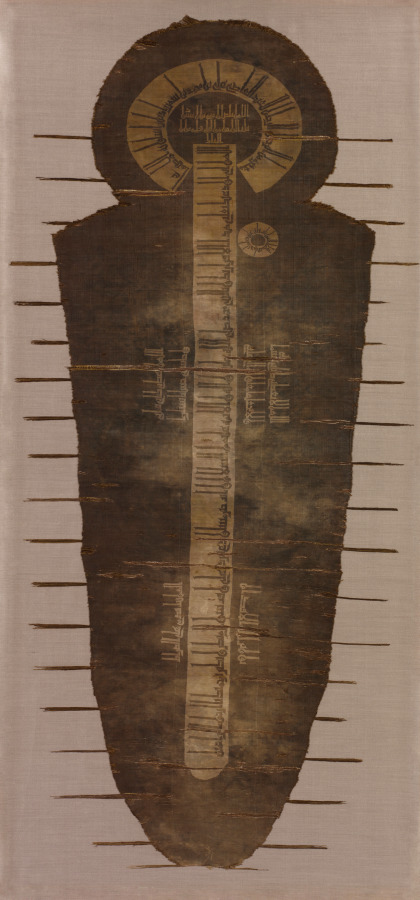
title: Tomb Cover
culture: Iraq or Iran, in the style of the Buyid period (945–1055)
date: 1640–1950 (radiocarbon date, 95% probability)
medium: compound tabby; silk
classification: Textile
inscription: Maghfirah min al-Rahman al-Rahim lil-'abd al-'asi 'Ali bin Muhammad bin Shahrazad bin Rastawayh al-Isbahani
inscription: Allahumma bayyid wajhi yawm taswaddu fihi al-wujuh wa-la'alla-ni [or la'alli] tujilluni yawm al-'ar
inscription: Allahumma thabbit qalbi 'alá dinaka bi-haqq Muhammad wa-alihi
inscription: Allahumma inni awda'tuka bi-qalbi hadha al-iqrar bika wa-bi-al-nabi Muhammad sallá Allah 'alayhi wa-alihi wa-al-a'immah 'alayhim al-salam wa-anta khayr mustawda' tarid 'alá waqt su'al Munkir wa-Nakir bi-rahmatika ya arham al-rahimin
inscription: Allahumma a'tini kitabi bi-yamini wa-hasibni hisaban yasiran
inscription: Allahumma la tu'tini kitabi bi-shimali wa-la taj'alha maghlulah ilá 'unuqi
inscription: Allahumma thabbit qadami 'alá al-sirat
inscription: yawm tazill fihi al-aqdam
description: This complete loom piece was woven to cover a human corpse: at the top, a circle to cover the head; below, a long tapering shape for the body. The only decoration on the dark brown ground consists of Kufic inscriptions reserved in beige on bands. The text which was undoubtedly composed for the decoration of a funeral pall gives the name of the deceased in the circle around the top. Other inscriptions refer to the part of the body over which the decoration lies.